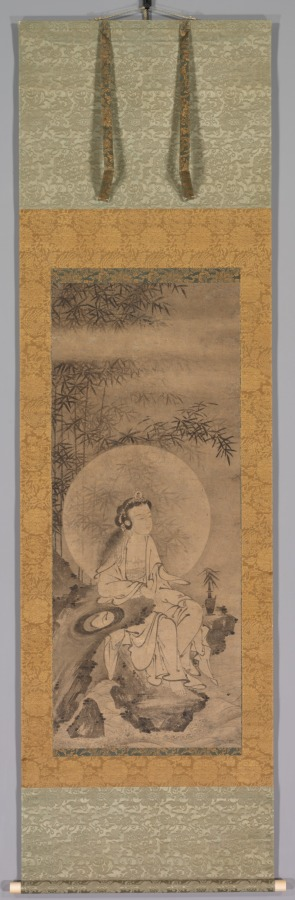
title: White-Robed Guanyin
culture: China, Southern Song dynasty (1127-1279)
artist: attributed to Zhang Yuehu (Chinese, active 1200s)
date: late 1200s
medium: Hanging scroll; ink on paper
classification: Painting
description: The figure here sits on a rocky elevation representing Potalaka in the Southern Sea, Avalokitesvara’s island home. A vase with a bamboo sprig holds pure water, the nectar of life. Bamboo shines through the figure’s halo, a way of seeing the illusionary world through the Buddhist truth. Avalokitesvara (Guanyin in Chinese), the bodhisattva of compassion, was integrated into the Chan Buddhist canon of venerated beings. In this context, the bodhisattva is often depicted in its female manifestation as the White-Robed Guanyin. The worship of the feminine White-Robed Guanyin has its origins on Mount Tianzhu in Hangzhou, where Qian Liu (852–932), ruler of the Wuyue kingdom, established the Upper Tianzhu Monastery to venerate her image.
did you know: As an artist, Zhang Yuehu was better known in Japan than in his own country.